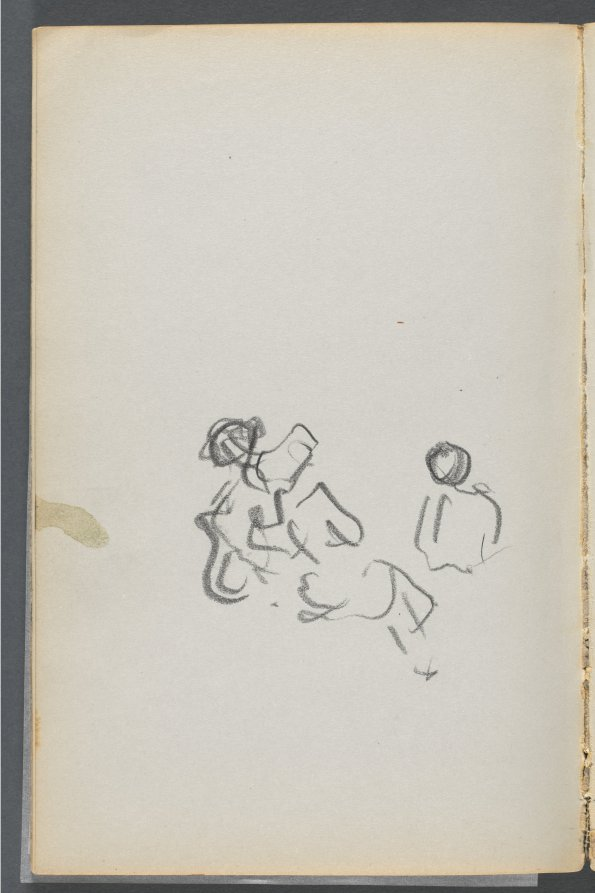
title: Sketchbook, The Dells, N° 127, page 054: Figures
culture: America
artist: Maurice Prendergast (American, born Newfoundland [now Canada], 1858–1924)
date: c. 1919–1921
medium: graphite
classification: Bound Volume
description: This sketchbook contains 59 pages of graphite drawings and 16 watercolors made at various locations on Cape Ann, Massachusetts.